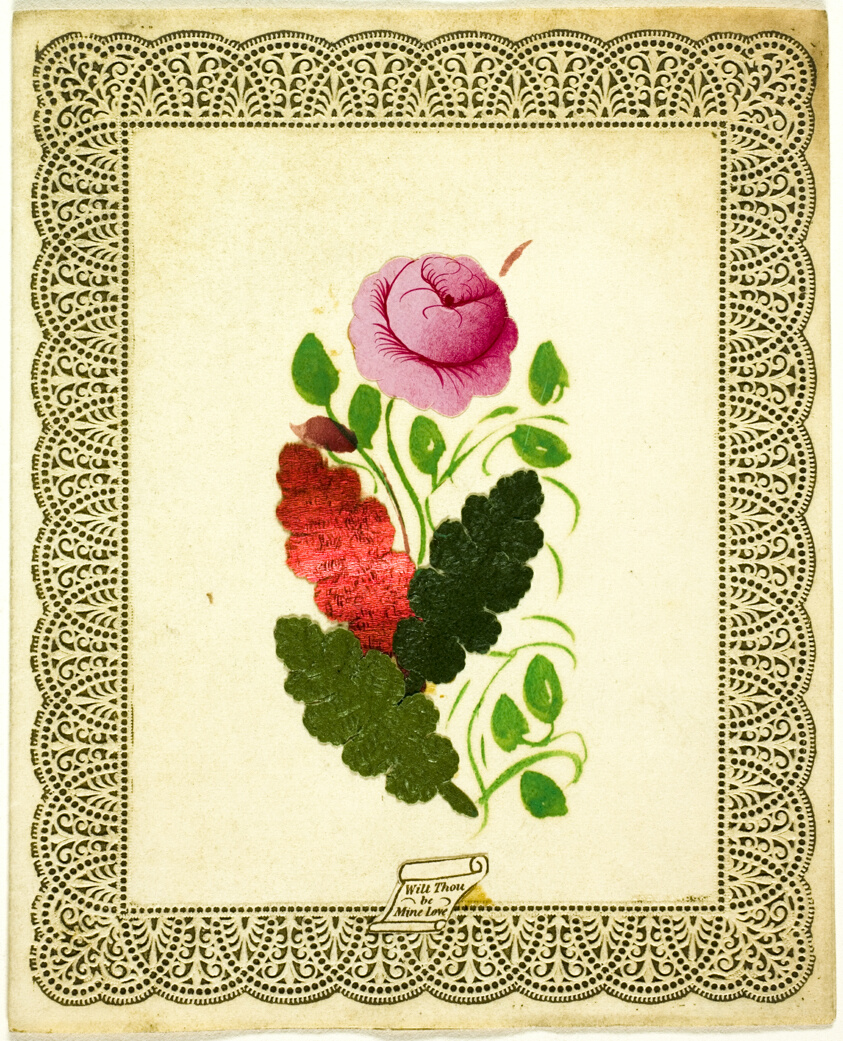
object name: Drawing and Watercolor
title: Wilt Thou Be Mine Love? (valentine)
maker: Joseph Addenbrooke (English, 19th century)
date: c. 1840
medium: Collaged elements, with watercolor on gray accented and embossed ivory wove paper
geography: England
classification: valentine; prints and drawing; paper